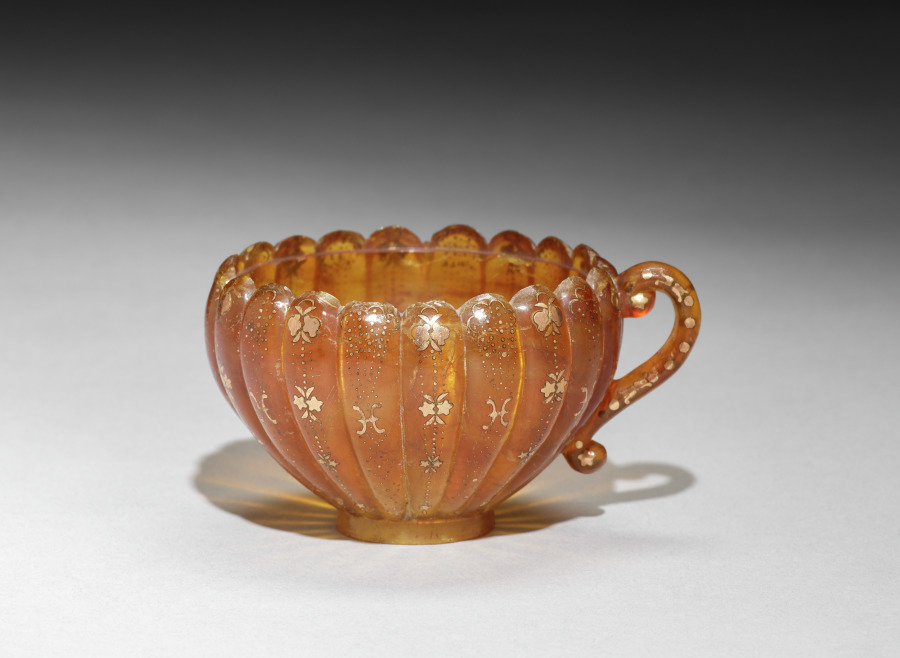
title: Cup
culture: France, 18th century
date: c. 1730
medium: amber decorated with inlaid gold and mother-of-pearl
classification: Miscellaneous